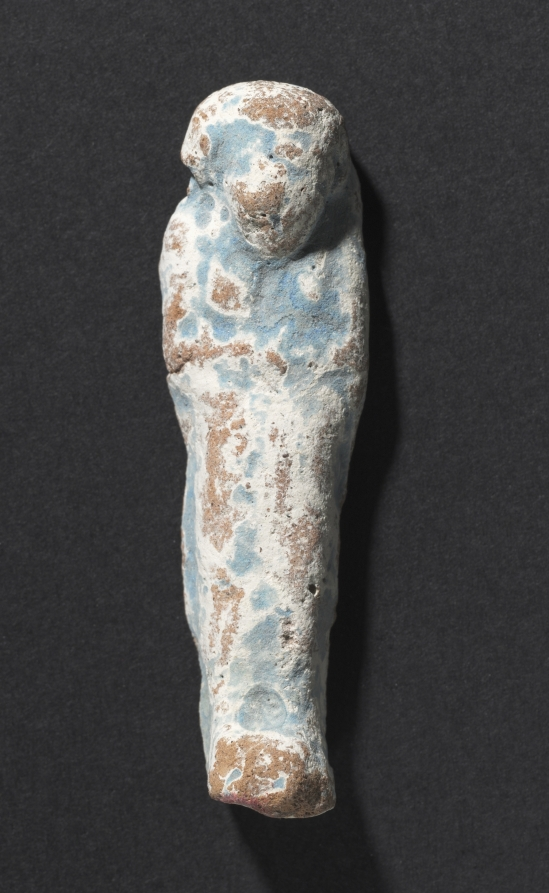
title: Shawabty of Ditamenpaankh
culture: Egypt, Late period (715–332 BCE), Dynasty 25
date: 715–656 BCE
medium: terracotta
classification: Funerary Equipment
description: High demand for shawabtys in the Late Period, a time when as many as 400 or more shawabtys were placed in the tomb with the deceased, gave rise to a specialized container for storing them: the shawabty box. This example is inscribed for the lady of the house, Ditamenpaankh, and was probably one of a pair originally made for her. The single-masted boat on the box's lid is perhaps an allusion to the pilgrimage of the deceased to the holy city of Abydos, the cult city of Osiris, king of the dead. The shawabtys inside are crude, mass-produced examples cast in an open mold. Made of terracotta, their blue paint imitates more costly shawabtys made of faience. As for the shawabty spell, it has been removed from its traditional location on the shawabty's front and relocated onto the sides of box, where it needed only to be written once, thus expediting production.